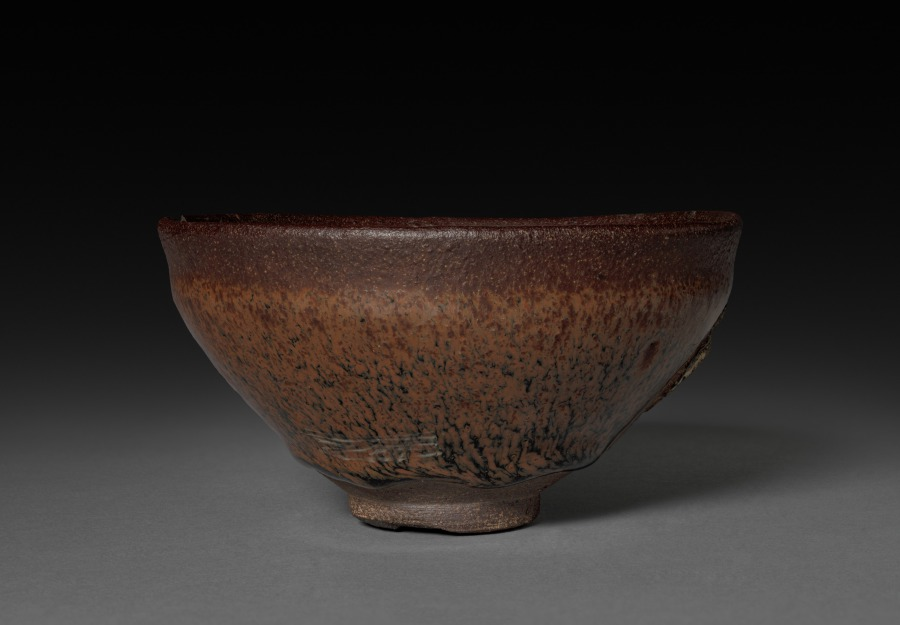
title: Tea Bowl: Jian ware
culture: China, near Shui ch'i, Song dynasty (960-1279)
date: 960–1279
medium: stoneware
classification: Ceramic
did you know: Jian ware was very popular with the tea cultures in China and Japan.